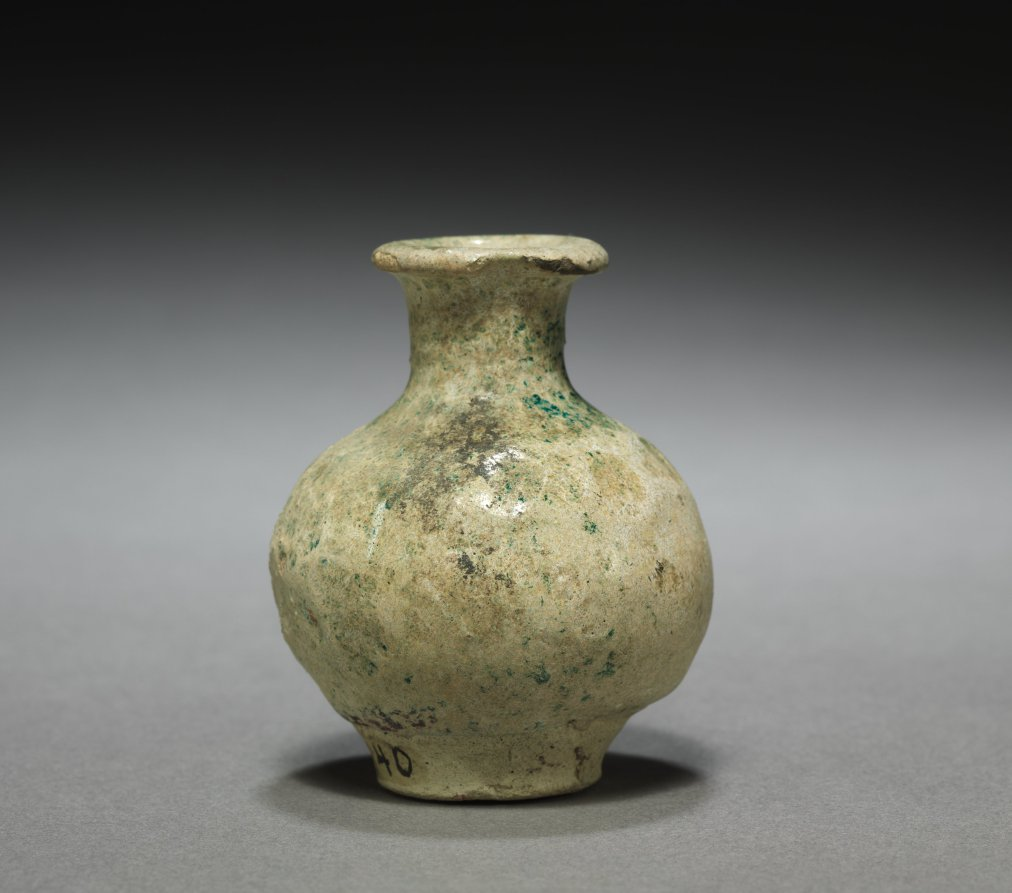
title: Jar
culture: Parthian Empire (247 BCE–224 CE)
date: 1–200 CE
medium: terracotta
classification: Ceramic